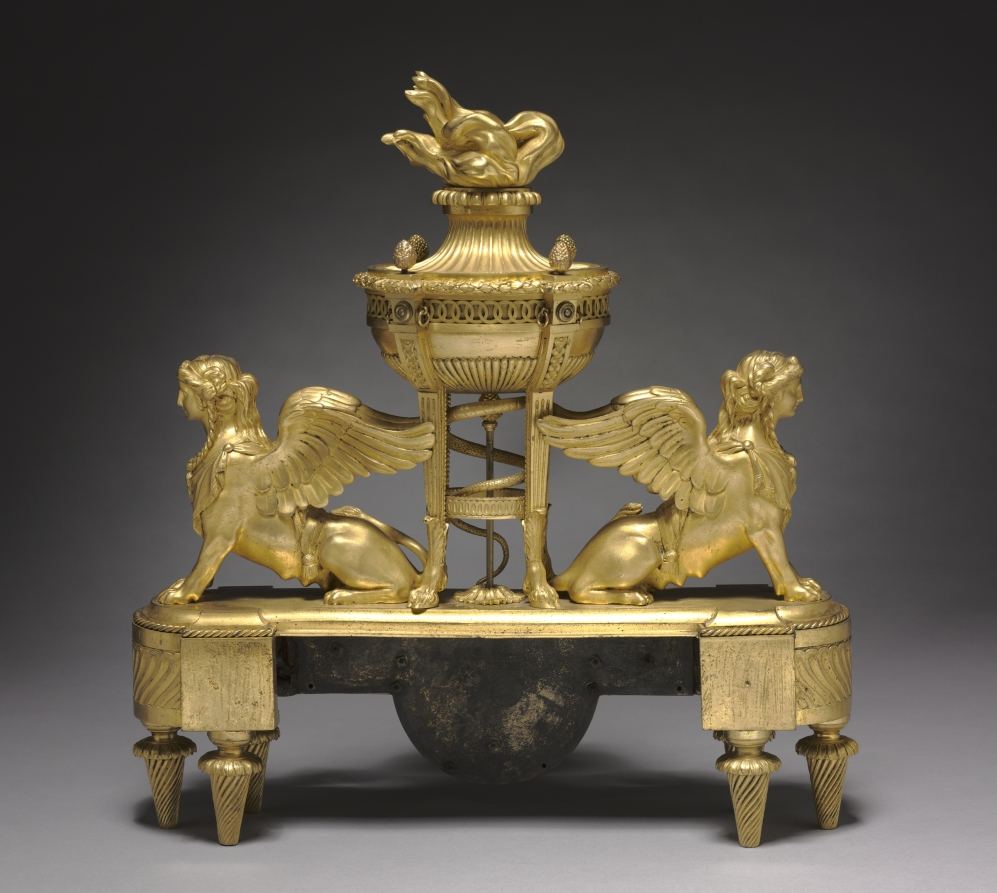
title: Firedog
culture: France, 18th century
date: c. 1785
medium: gilt bronze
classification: Furniture and woodwork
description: Although Louis Jean Desprez’s design was largely inspired by tombs in southern Italy, he added sphinxes in his print Tomb with Sphinx due to his fascination with ancient Egypt. Ancient Egyptians saw the sphinx, a half-human, half-lion mythological creature, as a protector of tombs and temples. The pair of andirons, decorative supports for a hearth’s firewood, alongside Tomb with Sphinx, highlight the growing interest in Egyptomania during the 1700s. Interestingly, the andirons portray ancient Greek and Roman interpretations of the sphinx. Most Europeans learned of ancient Egypt by studying Egyptomania in ancient Roman and Greek art and architecture or Egyptian antiquities brought over by the Romans.